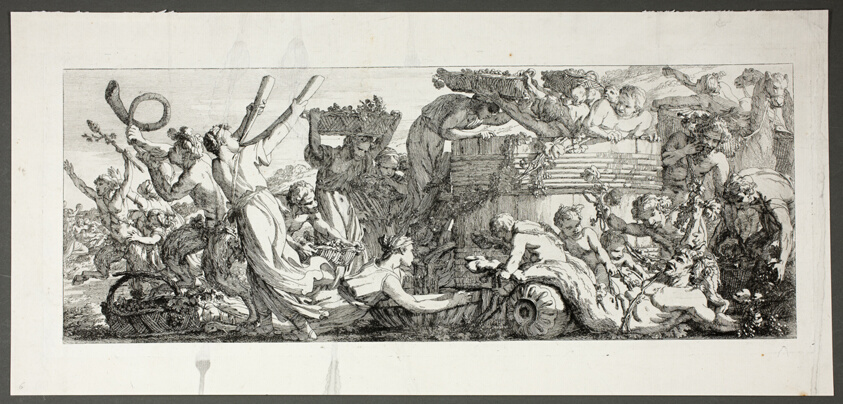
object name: Print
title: Arrival at the Grape Press, plate four of four from Le Travaux de la Vendange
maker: Joseph-Marie Vien, the elder; French, 1716–1809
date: 1750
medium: Etching on paper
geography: France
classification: etching; print; prints and drawing